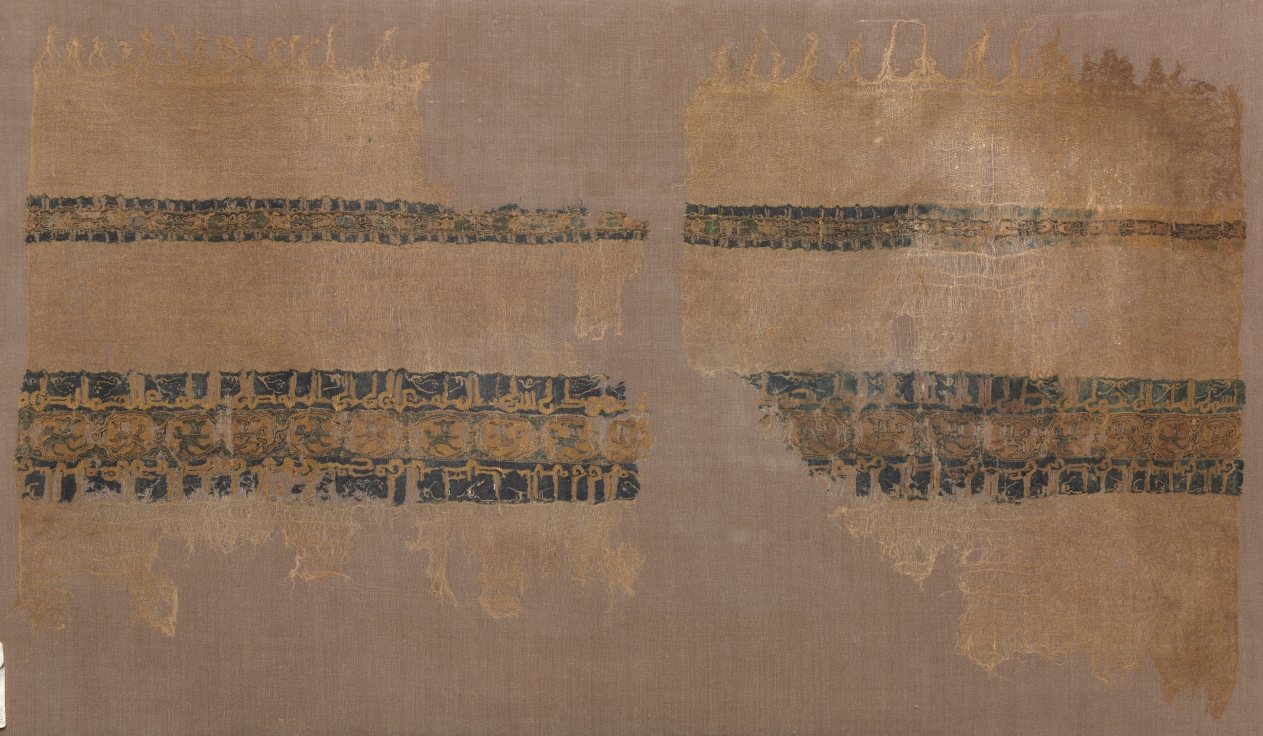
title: Turban end with tiraz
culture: Egypt, Fatimid period, Caliphate of al-Zahir, 1031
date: 1031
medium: plain weave with inwoven tapestry weave: linen and silk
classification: Textile